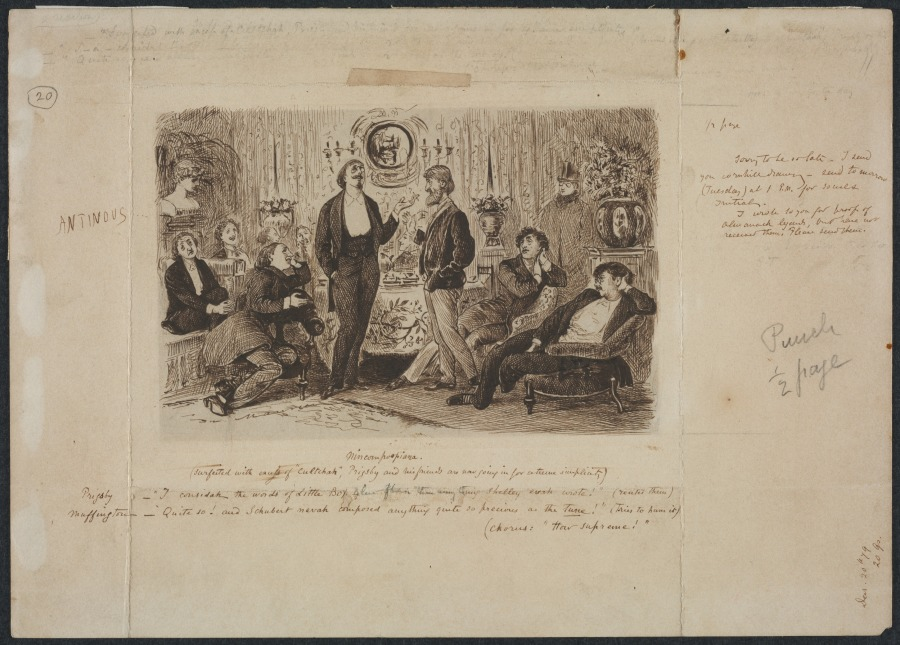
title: "Nincompoopiana," Illustration for Punch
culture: England, 19th century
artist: George Louis Palmella Busson Du Maurier (British, 1834–1896)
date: c. 1879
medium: pen and brown ink with touches of graphite on wove paper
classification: Drawing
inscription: inscribed in brown ink, on carpet: du Maurier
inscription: inscribed, in brown ink, lower margin: Nincompoopians / (Surfeited with excesses of Cultchah," Prigsby and his friends are now going in for extreme simplicity)/ Prigsby - I consider the words of "Little Boy Blue" finer than anything Shelley evah wrote!" Recites them) /Muffington - "Quite so! And Schubert nevah composed anything quite so precious as the Tune!" (Tries to hum it)/ (Chorus: "How supreme!"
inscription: inscribed, top margin, in graphite, very worn: [same as lower inscription]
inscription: inscribed, upper left margin in graphite: 20 (encircled)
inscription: inscribed, upper left margin in graphite: 20 (encircled)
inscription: inscribed, left margin,and on bust, in brown ink: ANTINOUS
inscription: inscribed, upper right margin, in brown ink: ½ page / Sorry to be so late - I send you cornhill [?] drawing - send tomorrow / (Tuesday) at 1 P.M. for socials / Initials / I write to you for proof of almanac legends, but have not / received them. Please send them.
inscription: inscribed, center right margin, in graphite: Punch / ½ Page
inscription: inscribed, lower right margin, in brown ink: Dec. 20th 79 / 20 gs.